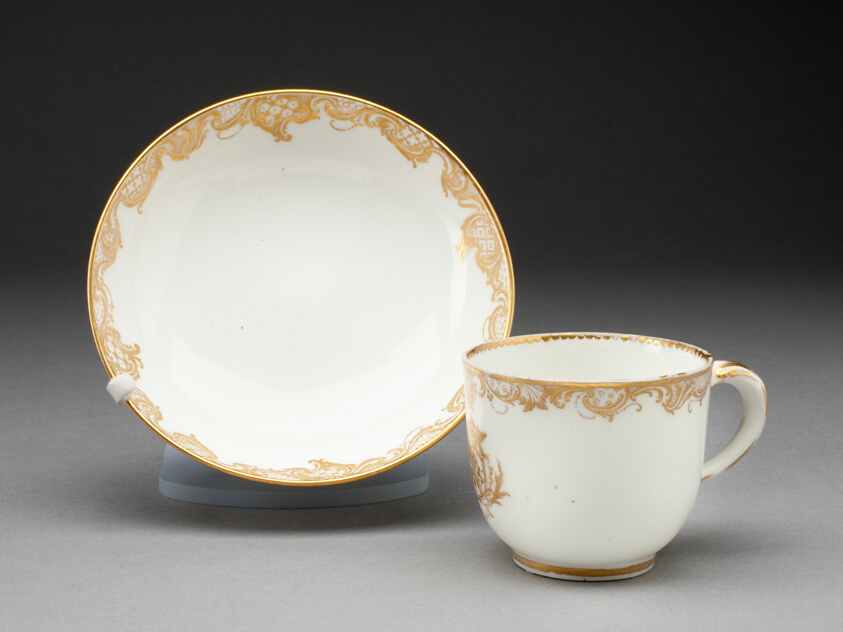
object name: Ceramics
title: Cup and Saucer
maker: Sèvres Porcelain Manufactory; French, founded 1740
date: c. 1757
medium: Soft-paste porcelain and gilding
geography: Sèvres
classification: drinking vessel; teaware; ceramics; porcelain; european decorative arts